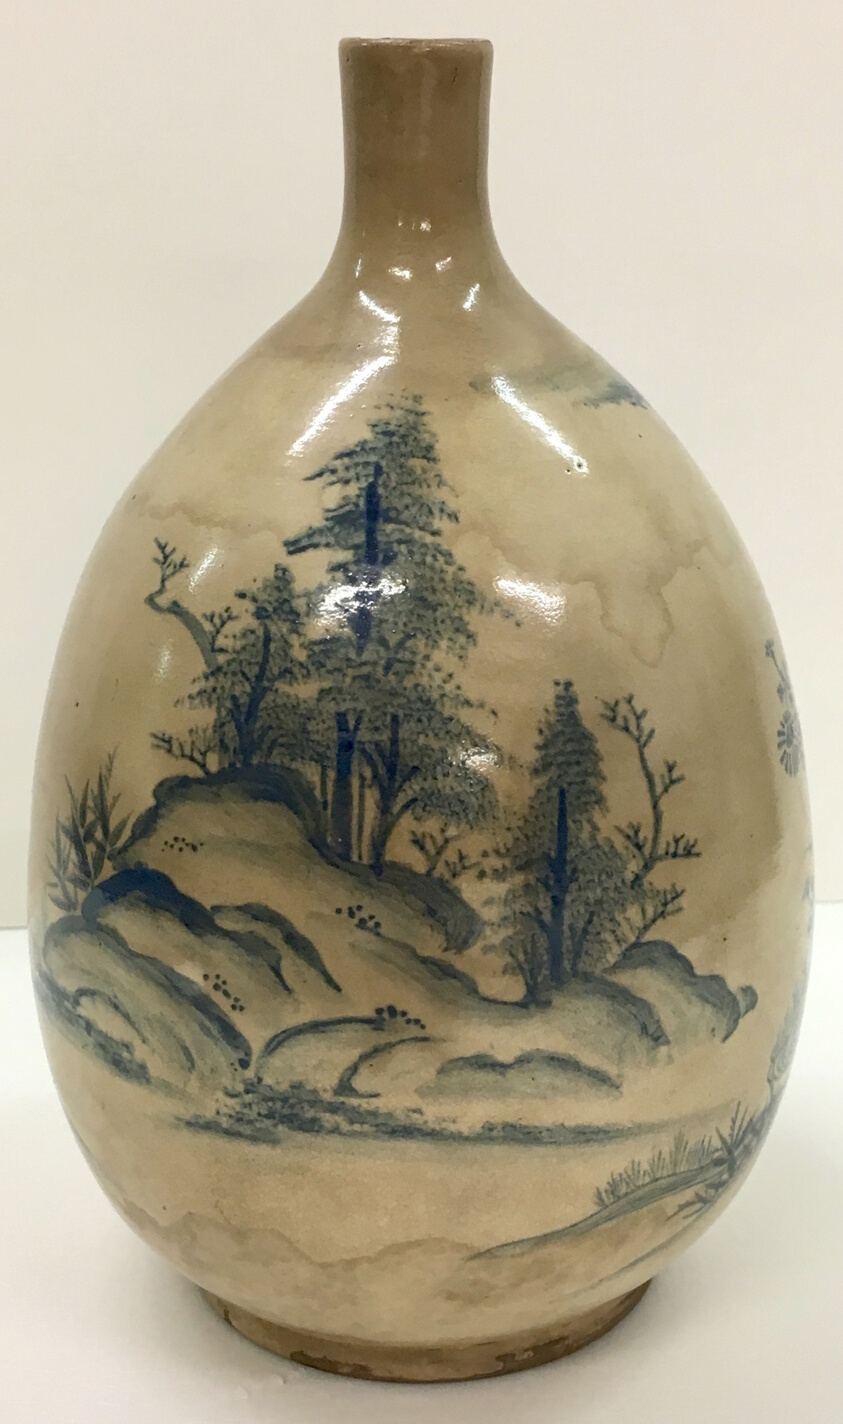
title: Kiyomizu-Type Sake Bottle with Design of Chrysanthemum Boy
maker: Taizan; Japanese, active about 1770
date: About 1770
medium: Stoneware with blue underglaze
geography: Japan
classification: porcelain; ceramics; asian art